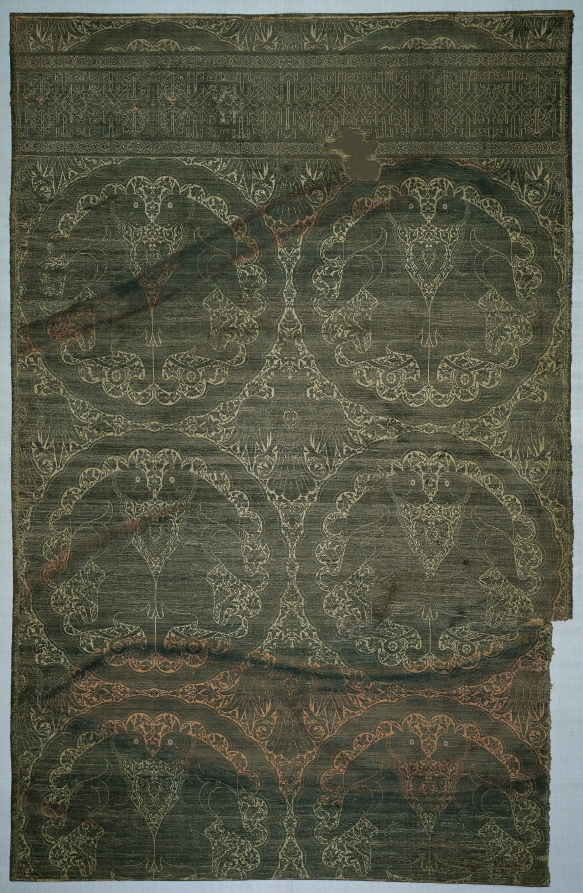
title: Cloth of gold with felines and eagles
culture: Northeast Iran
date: 1225–75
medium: Silk and gold thread: lampas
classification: Textile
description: Mongol taste for luxury was equated with gold, symbol of imperial authority, power, and legitimacy. This splendid cloth of gold-exceptionally large and luxurious-may have enriched the interior of a palace or a majestic tent. The golden pattern, although tarnished on the faded red silk ground, features scalloped medallions with felines whose long tails terminate in dragons’ heads amid elegant floral vines. Double-headed eagles form interstitial motifs on the floral ground. A radiant gold-on-gold band of pseudo-Arabic script enriches the top, woven with gold strips wrapped around a silk core on a ground of flat strips of gold, immediately beneath the pattern testing area.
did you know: Mongol cloths of gold, called nasji, incorporate Iranian, Central Asian, and Chinese features, reflecting the effects of gift exchanges and international commerce.